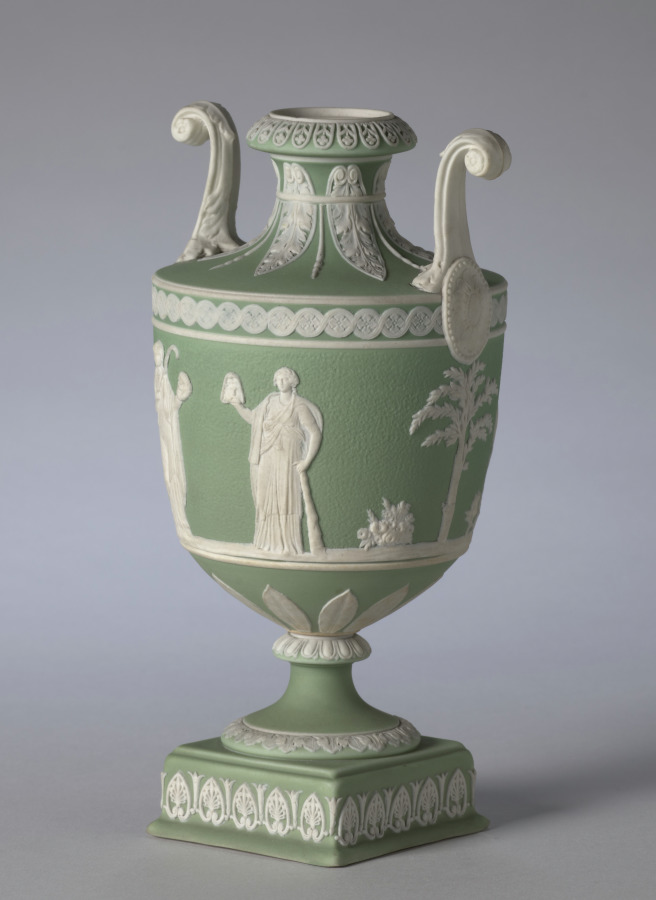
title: Urn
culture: England, Staffordshire, late 18th-early 19th Century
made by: Wedgwood Factory (British)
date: c. 1800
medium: jasper ware with relief decoration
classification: Ceramic